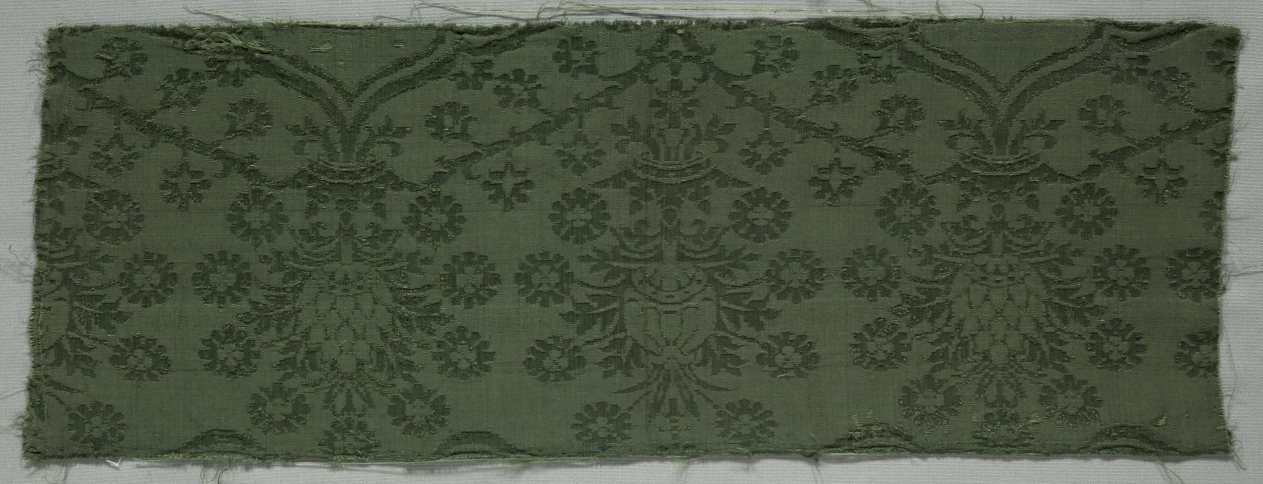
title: Silk Damask Textile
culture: Italy, second half of the 15th century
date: 1450–1599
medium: damask, silk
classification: Textile